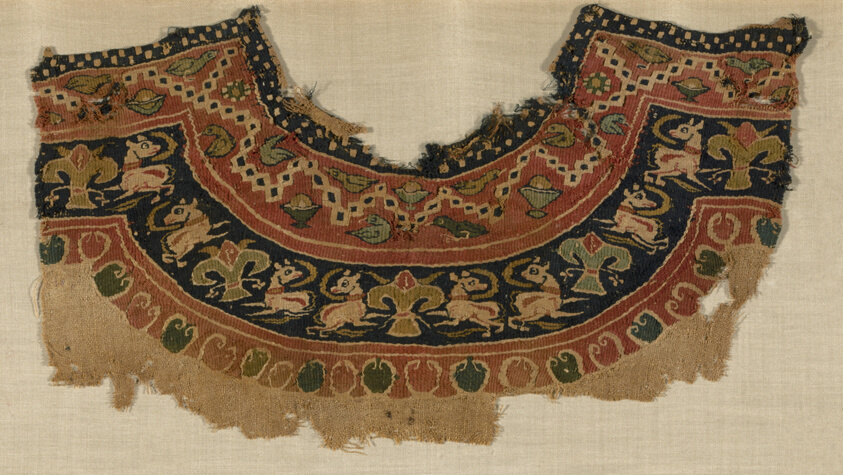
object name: Textile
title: Fragment (Tunic Yoke)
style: roman period (egyptian)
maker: Coptic (Egypt)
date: Roman period (30 B.C.– 641 A.D.)/Arab period (641–969), 6th/8th century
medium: Linen and wool, tapestry weave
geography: Egypt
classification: textile; weaving